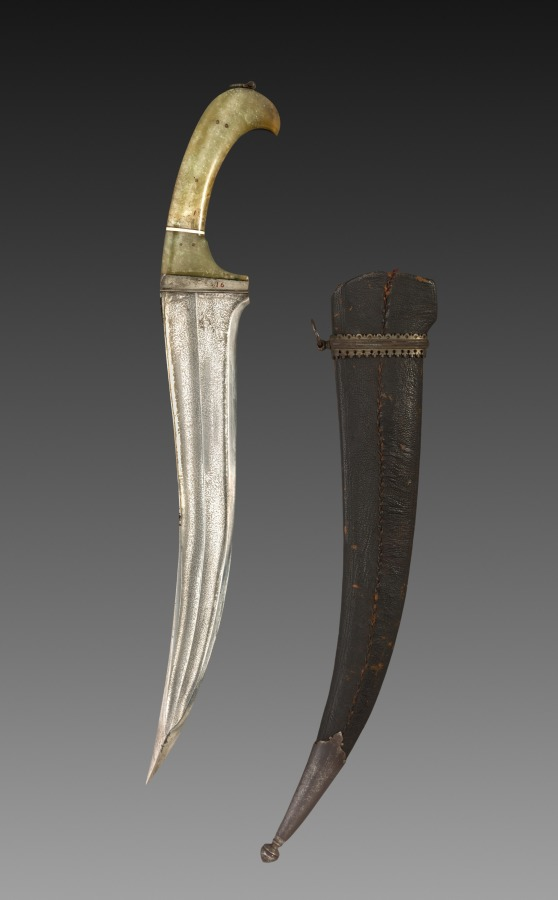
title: Knife with Jade Handle and Scabbard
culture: East India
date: c. 1750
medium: steel and jade, with leather and silver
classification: Arms and Armor